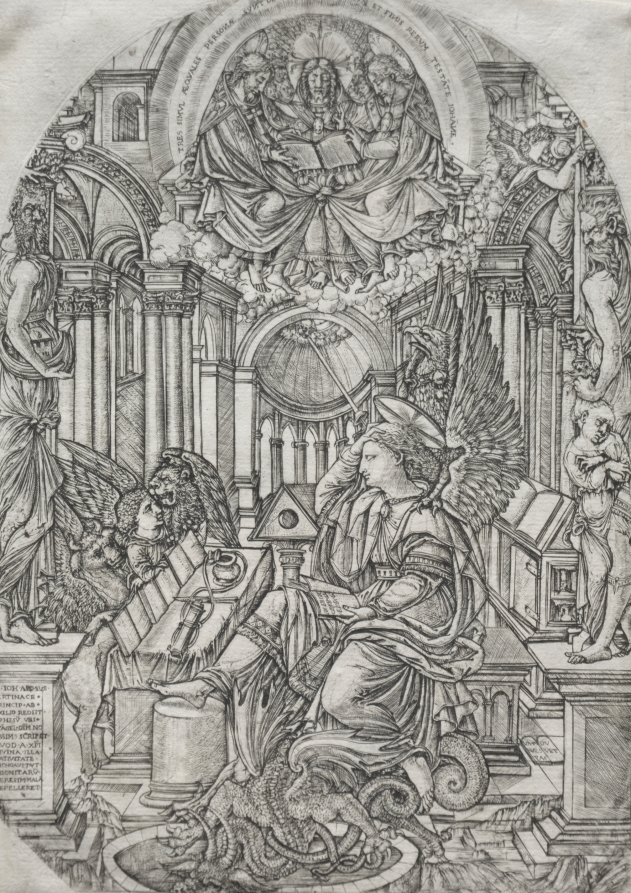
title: The Revelation of Saint John the Evangelist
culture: France, 16th century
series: The Apocalypse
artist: Jean Duvet (French, 1485–1561)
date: c. 1555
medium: engraving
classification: Print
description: In addition to the rare bound volume, the museum owns individual impressions of prints from The Apocalypse.